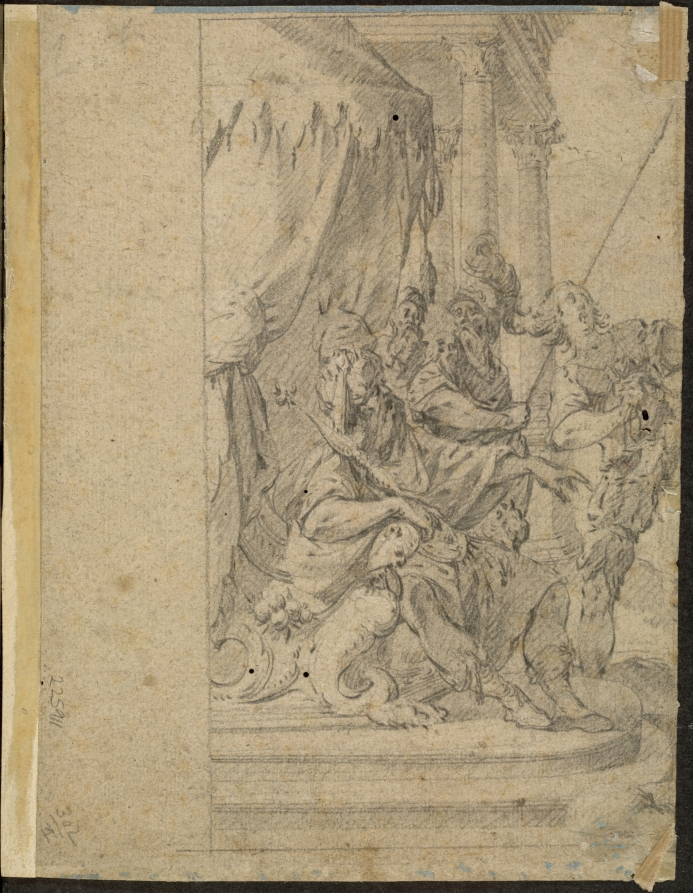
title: Studies of Angels (recto); Panthea before Cyrus? (verso)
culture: France, 17th century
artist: Michel Dorigny (French, 1617–1665)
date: 1655–60?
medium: black chalk heightened with white chalk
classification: Drawing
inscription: verso, lower left, in graphite: 225911 [sideways]; lower left, in graphite: 302 [underlined] / 1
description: Dorigny was the collaborator and son-in-law of Simon Vouet, the leading painter working in Paris in the mid-1600s. Their drawing styles are similar, and this sheet was once attributed to Vouet. However, the airy, floating drapery, firm contour lines, and regular parallel hatching lines are all typical of Dorigny's technique in black chalk. Although we do not know of a painting to which this drawing relates, the flying angels indicate that Dorigny had a religious subject in mind when he drew them.